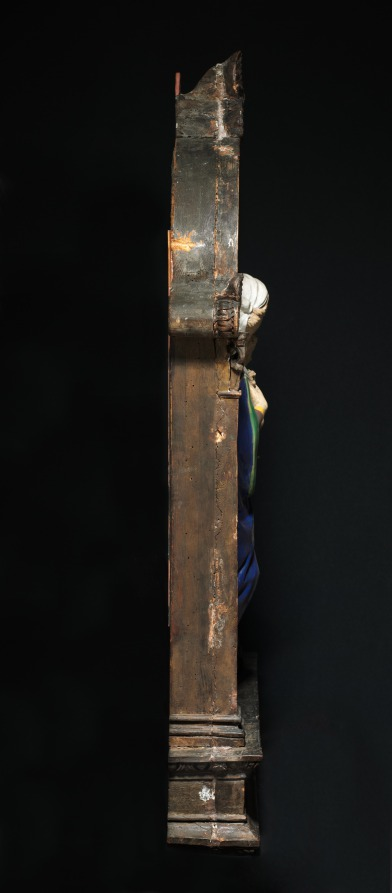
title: Virgin and Child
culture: Italy, late 15th-early 16th Century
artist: Benedetto Buglioni (Italian, 1461–1521)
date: 1500–1510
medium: glazed terracotta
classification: Sculpture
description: This small devotional object differs stylistically from Buglioni's Madonna and Child Enthroned with Saints Francis and Anthony Abbot (1921.1180), also in the museum's collection. In contrast to the other work, the faces of the Madonna and Child are significantly less expressive, and the passages of exposed skin have been left unglazed. The Madonna holds a nude Christ on her left arm and wears a mantle of blue with green lining and a maroon tunic with a yellow collar and cuffs. Her bright yellow shoes and the purple of her tunic are characteristic of Buglioni's color scheme and can also be seen in the other work. The tabernacle frame is probably contemporary to the figures, although it may not have been created specifically for this altarpiece. Buglioni likely worked in the studio of Andrea della Robbia, where he would have studied the family's techniques for glazing terracotta. The frame is classically inspired, with Corinthian capitals and Buglioni's characteristic egg and dart moldings. The facial type in this Madonna and Child recalls Buglioni's Madonna delle Grazie in Florence's Palazzo Frescobaldi, and because of this similarity, the scholar Allan Marquand attributed the Cleveland Madonna and Child to Buglioni in 1921, although this attribution has since been questioned.